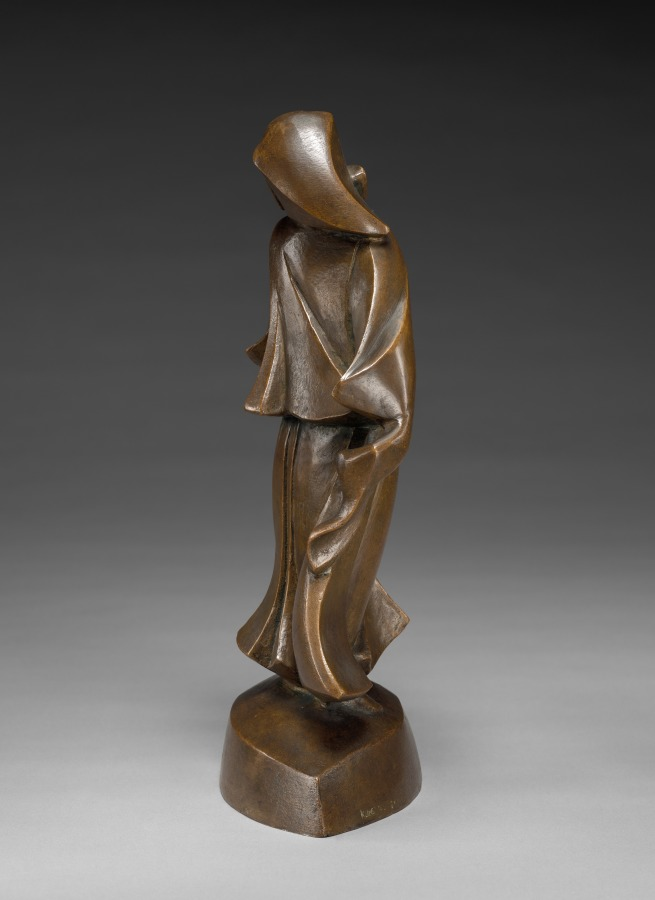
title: Russian Dancer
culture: America, Ohio, Cleveland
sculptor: Alexander Blazys (American, born Russian Empire [now Lithuania], 1894–1963)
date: 1925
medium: bronze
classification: Sculpture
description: A Lithuanian immigrant, Blazys introduced modernist sculpture to Cleveland upon his arrival in 1925. These figures merge rhythmic movement inspired by music with faceted, geometric planes derived from Cubism.